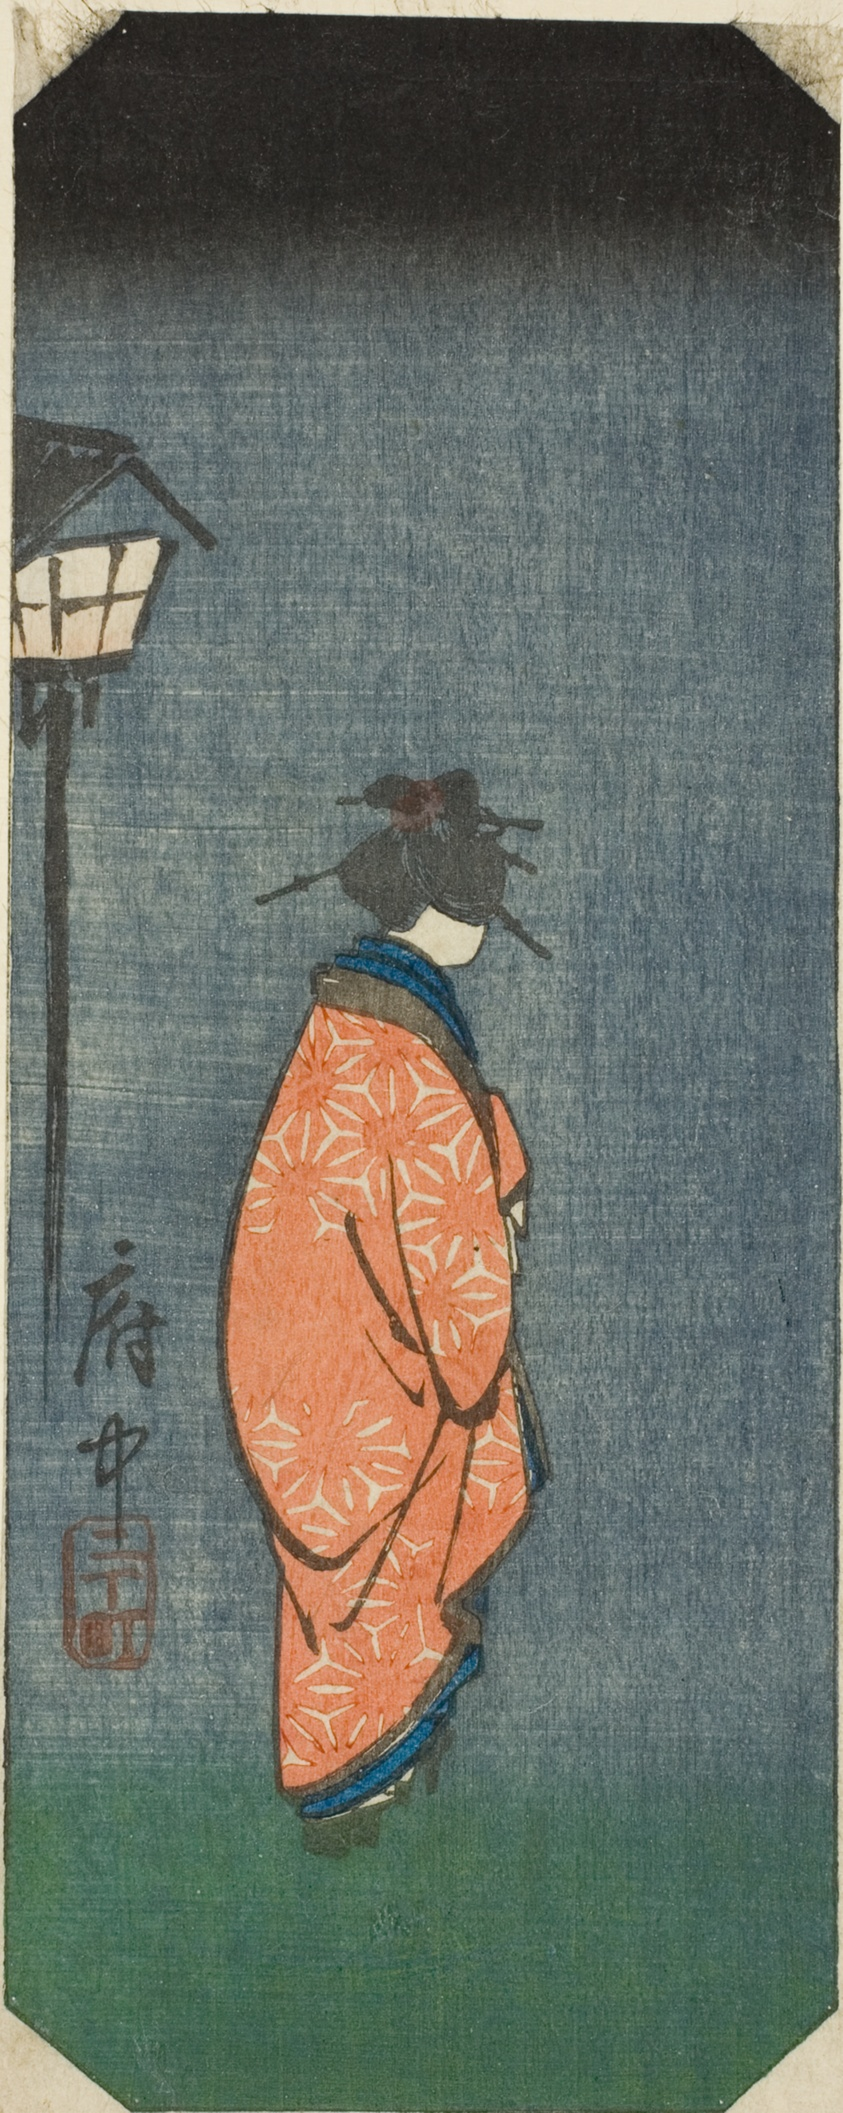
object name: Print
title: Nichomachi in Fuchu, section of sheet no. 6 from the series "Pictures of the Fifty-three Stations of the Tokaido (Tokaido gojusan tsugi zue)"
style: Japanese (culture or style)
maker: Utagawa Hiroshige 歌川 広重; Japanese, 1797-1858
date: 1856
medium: Color woodblock print; section of harimaze sheet (uncut sheet: 1939.1301)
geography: Japan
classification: woodblock print; print; asian art